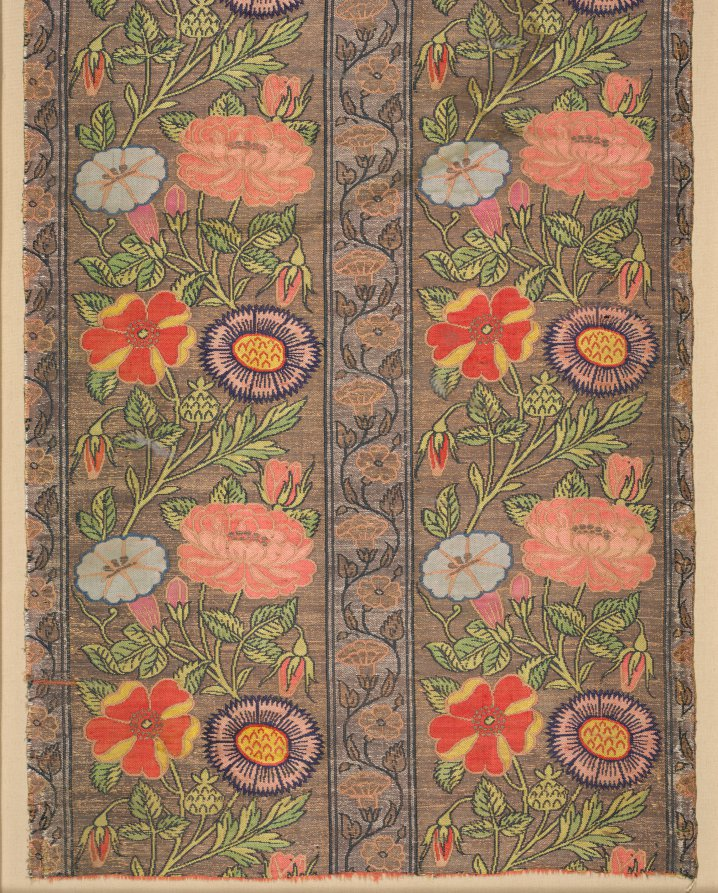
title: Floral striped silk on a golden ground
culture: Iran, Safavid period (1501–1722)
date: 1600–1650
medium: silk, gilt- and silver-metal thread: samite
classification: Textile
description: Twelve jewel-like colors of silk thread illustrate the vivacity of colors extolled in Iranian flowers on gilt- and silver-metal thread grounds. In a simplified seminaturalistic style, swaying branches support an exuberant array of blossoms in the Safavid tradition while the botanical accuracy of European prints inspired flora in varied angles and stages of maturity. Although celebrated in Iranian poetry for centuries, flowers were not featured in paintings and textiles until the 1640s, inspired by European herbals. This sturdy silk retains its radiant colors in contrast with many silks that have faded from excessive light exposure, especially the reds and pinks that were dyed with light-sensitive safflower dyestuff.